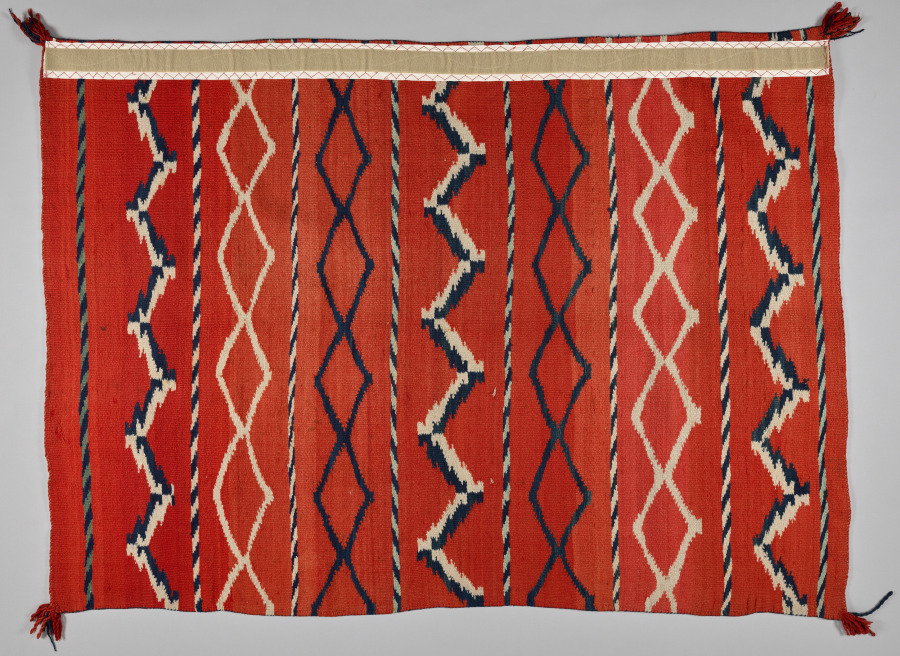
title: Wearing Blanket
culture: Native North American, Southwest, Navajo (Dine), woman artist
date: late 1800s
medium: Wool (handspun): tapestry weave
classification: Textile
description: Diné (Navajo) artists wove geometric designs that reference the natural environment as well as embody spiritual insights and meanings. Specific patterns were inherited but also evolved over time. This blanket was created during the late 1800s, when weavers in the Southwest began to shift from making garments for Indigenous use, including trade, to additionally create items for non-Native collectors. In this new market, traditional wearing blankets, which were worn around the shoulders, were purchased as rugs.